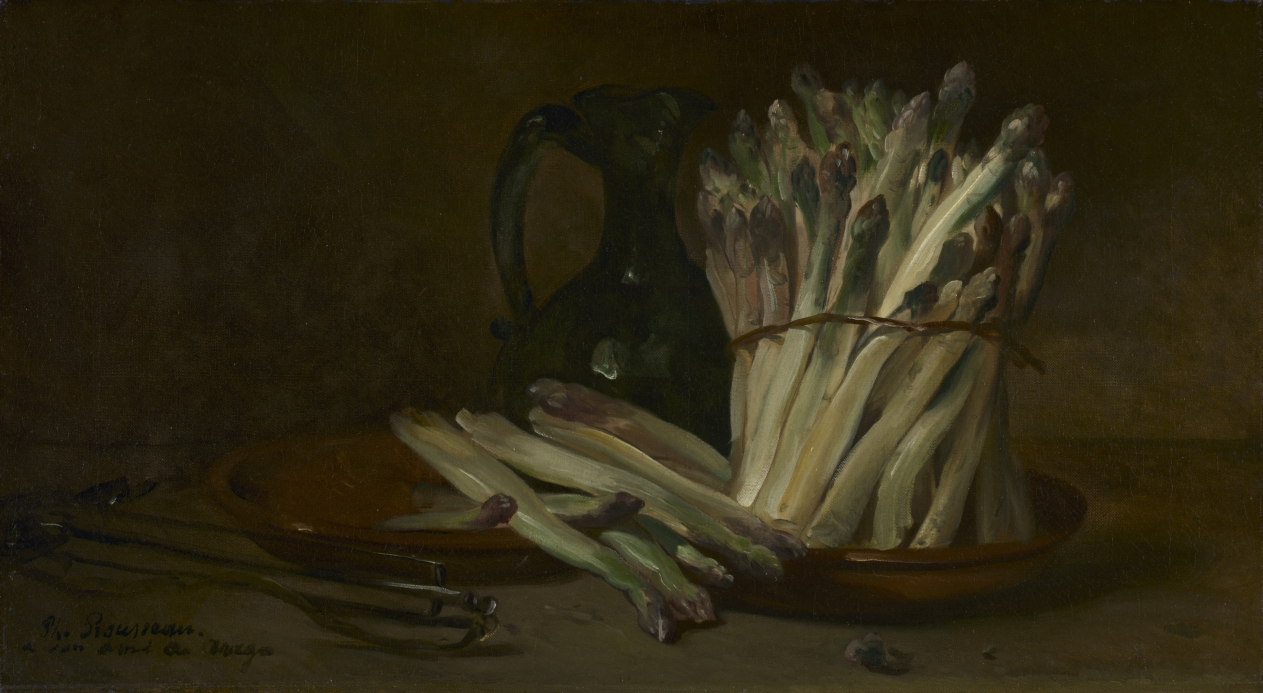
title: Still Life with Asparagus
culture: France, 19th century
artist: Philippe Rousseau (French, 1816–1887)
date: c. 1880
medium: oil on fabric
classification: Painting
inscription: Signed lower left: Ph. Rousseau. / à son ami A Arago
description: Rousseau was profoundly influenced by the atmospheric still lifes of Jean Siméon Chardin (1699-1779), whom the artist and other French painters like François Bonvin (1817-1877) rediscovered in the mid-1800s. A comparison with Chardin's work, also shown in this gallery, indicates that Rousseau similarly depicted foodstuffs on a simple kitchen table, concentrating on rich textures and restrained colors.